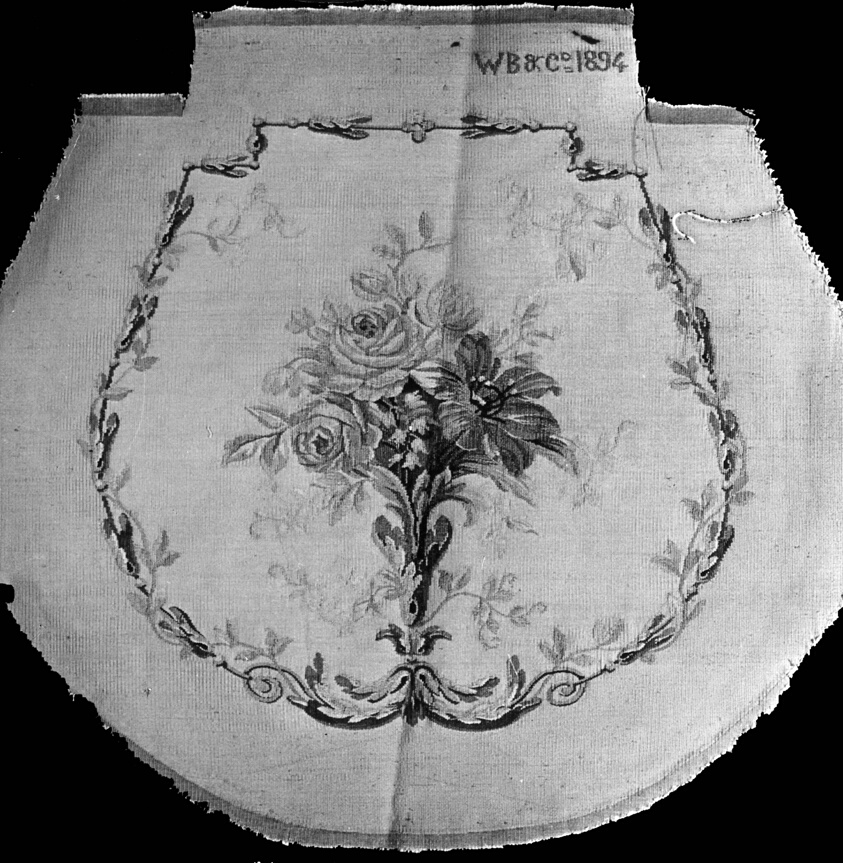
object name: Textile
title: Chair Cover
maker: Produced by William Baumgarten and Company (active 1893-1912); Woven by Jean Foussadier (1850?-1923); United States, New York, New York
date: 1894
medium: Cotton, wool, and silk, slit and double interlocking tapestry weave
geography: New York City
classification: weaving - tapestry; textile